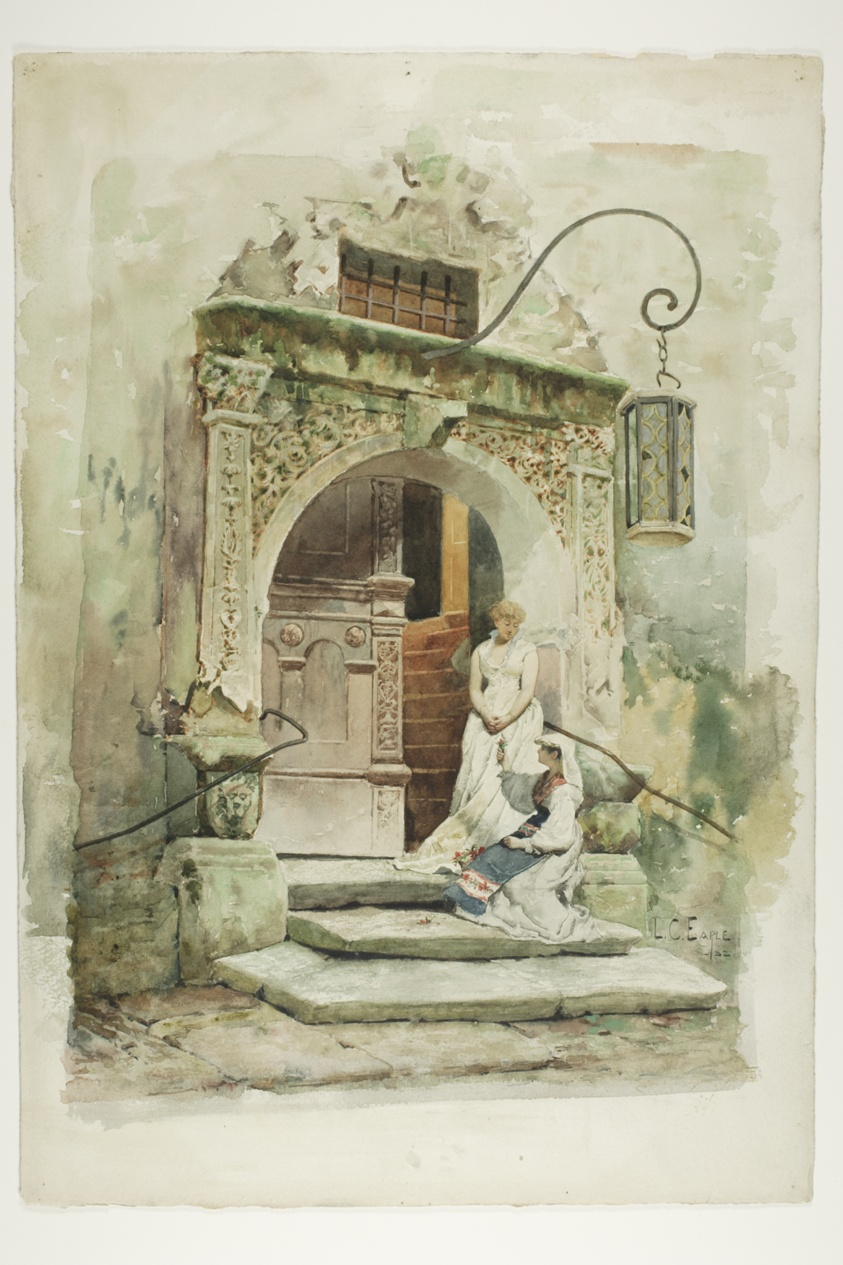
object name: Drawing and Watercolor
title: Two Women in a Doorway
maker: Lawrence Carmichael Earle (American, 1845-1921)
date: 1882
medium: Watercolor and gouache, over traces of graphite, on cream watercolor paper, laid down on wood-pulp board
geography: United States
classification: watercolor; drawings (visual works); prints and drawing